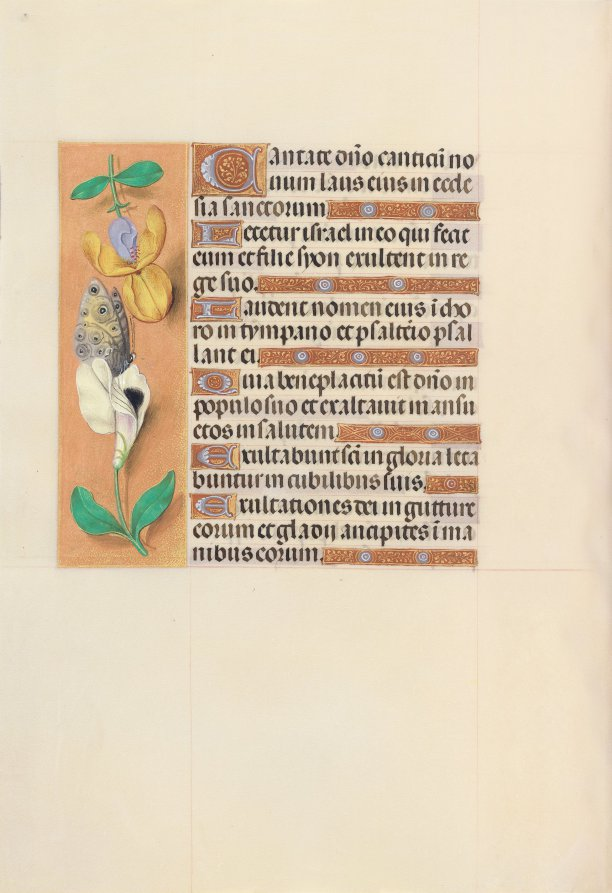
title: Hours of Queen Isabella the Catholic, Queen of Spain: Fol. 121v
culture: Flanders, Ghent and Bruges, late 15th century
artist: Master of the First Prayerbook of Maximillian (Flemish, c. 1444–1519)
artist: and Associates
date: c. 1500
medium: ink, tempera, and gold on vellum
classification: Bound Volume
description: This manuscript was illuminated by a circle of at least five highly organized manuscript painters active in the Flemish cities of Ghent and Bruges. The principal illuminator was Alexander Bening, who painted the majority of the book's miniatures. Manuscripts produced by this circle of artists are renowned for the decoration of their borders, which typically feature a rich variety of realistically-painted flowers, birds, and butterflies. This prayer book, called a book of hours, was intended not for a cleric, but for the private devotions of a lay person-in this case, Isabella the Catholic, Queen of Spain (1451-1504). Isabella's coat of arms embellishes the book's frontispiece. It is unlikely that the book was commissioned by the Queen herself; rather, she probably received it as a diplomatic gift from someone courting her patronage, perhaps Cardinal Francisco Jimenez de Cisneros. A Franciscan friar, Jimenez was dependent upon Isabella for his advancement, first to the post of Queen's confessor in 1492, and then to Archbishop of Toledo in 1495.